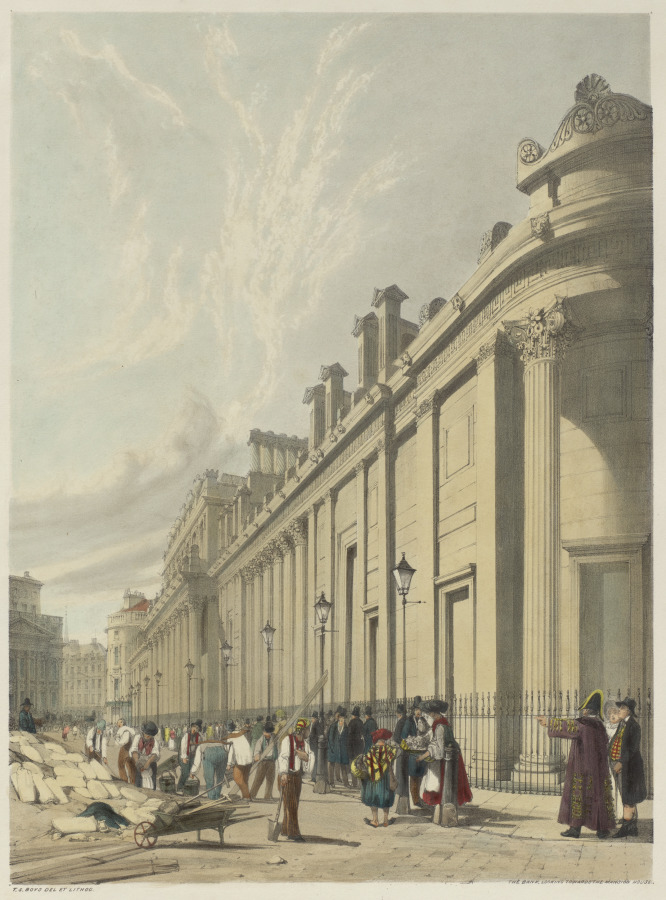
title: London As It Is: The Bank, Looking towards the Mansion House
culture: England, 19th century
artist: Thomas Shotter Boys (British, 1803–1874)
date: 1842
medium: lithograph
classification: Bound Volume